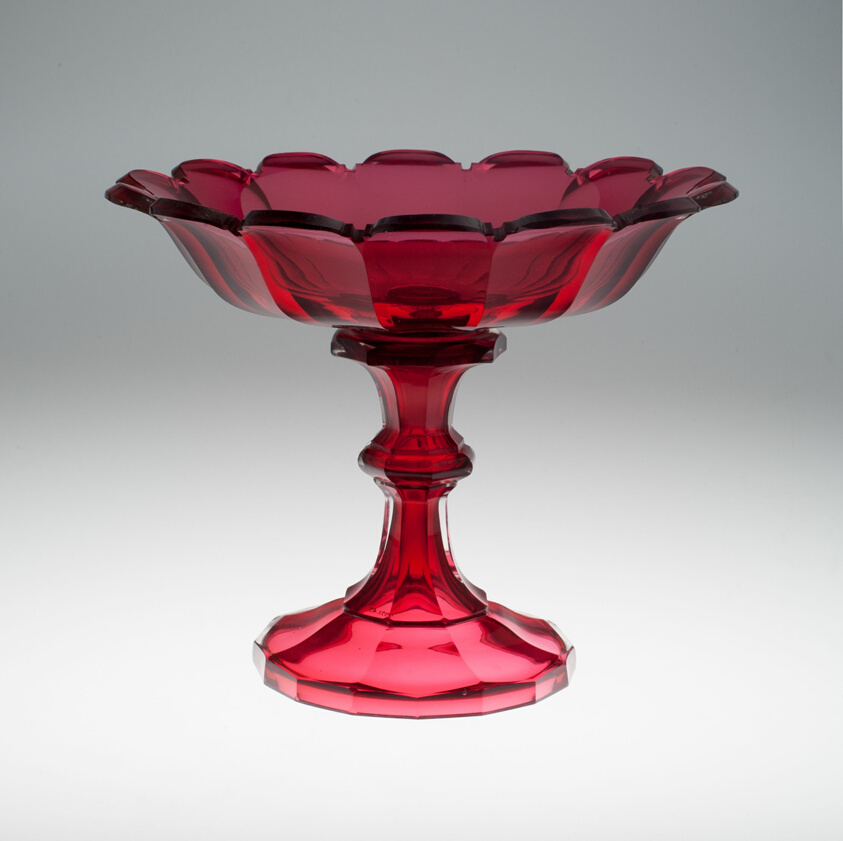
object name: Glass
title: Compote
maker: Bohemia, Czech Republic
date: c. 1850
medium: Glass with red flashing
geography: Bohemia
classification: compote; glass; dish (vessel); european decorative arts